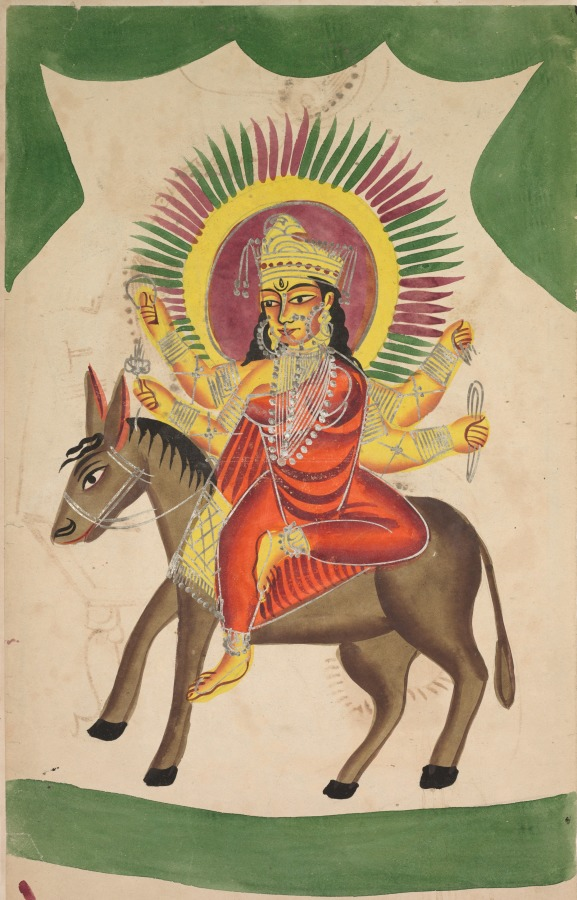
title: Sheetaladevi: The Smallpox Goddess (recto), from a Kalighat album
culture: Eastern India, Bengal, Kolkata, Kalighat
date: c. 1890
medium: Gum tempera, graphite, ink, and tin on paper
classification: Painting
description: Sheetala, the smallpox goddess, is simultaneously benevolent and dangerous: she can both protect and infect, bless and curse devotees with smallpox and other diseases. Persons scarred by smallpox are believed to have been graced by her. She is appeased so that she does not infect her worshippers. Her name, Sheetala, “Cool One,” refers to her birth out of a cooled sacrificial fire. The rippled curtains above her are suggestive of theatrical tableau and Sheetalapala (The Drama of Sheetala) that was performed in Bengal. She sits astride her vehicle (vahana), the donkey, regarded as an inauspicious animal.